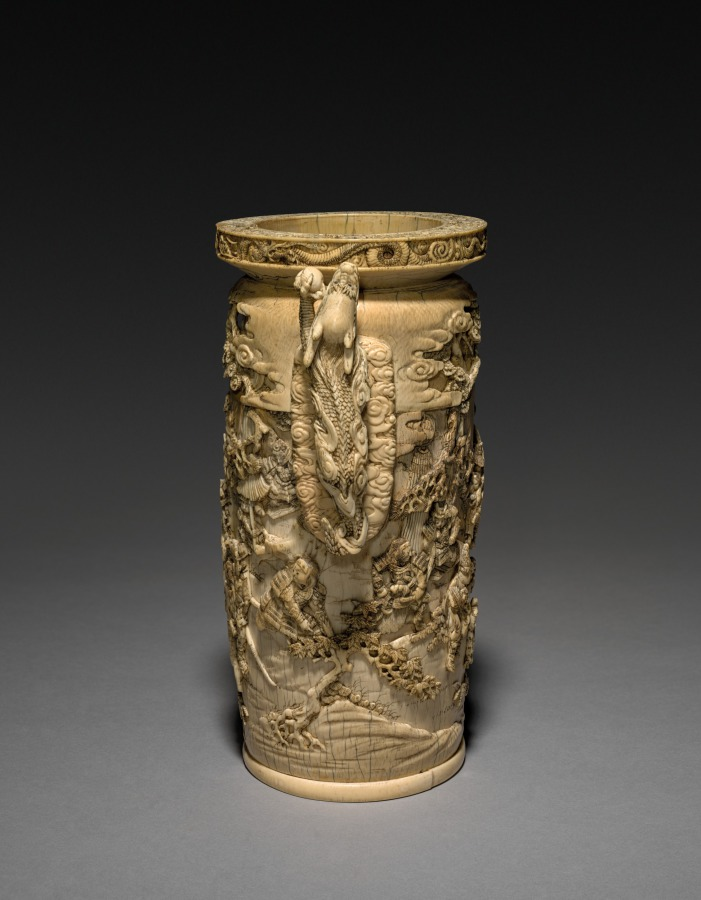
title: Carved Vase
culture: Japan, Edo period (1615–1868) to Meiji period (1868–1912)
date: 1800s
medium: ivory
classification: Ivory